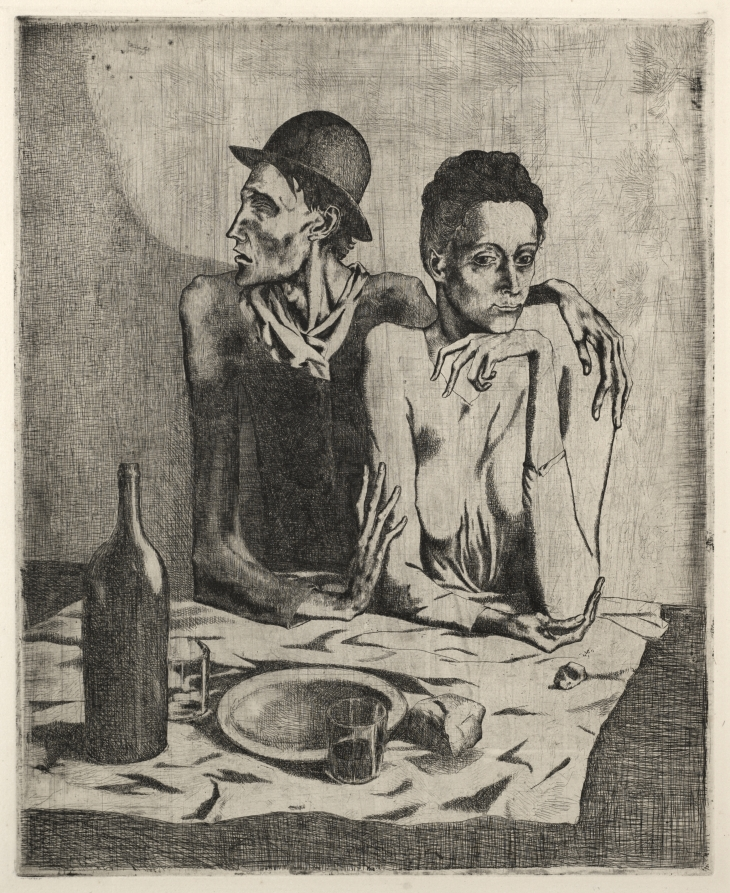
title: The Frugal Meal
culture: Spain, 20th century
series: The Saltimbanques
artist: Pablo Picasso (Spanish, 1881–1973)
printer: Louis Fort (French, active 1800s–1900s)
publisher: Ambroise Vollard (French, 1867–1939)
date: September 1904, printed 1913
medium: etching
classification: Print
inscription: watermark: VAN GELDER ZONEN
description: In this early print, Pablo Picasso depicted a couple—possibly two performers—sitting before a meager meal. Although the woman gazes forward directly, her male companion's unfocused stare suggests his blindness. This subject was one that Picasso explored during his Blue Period (1901–4), a stage of his career when he used a predominantly cool palette to depict figures marginalized by society.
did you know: To create this print, Pablo Picasso recycled a zinc plate previously used by a friend.